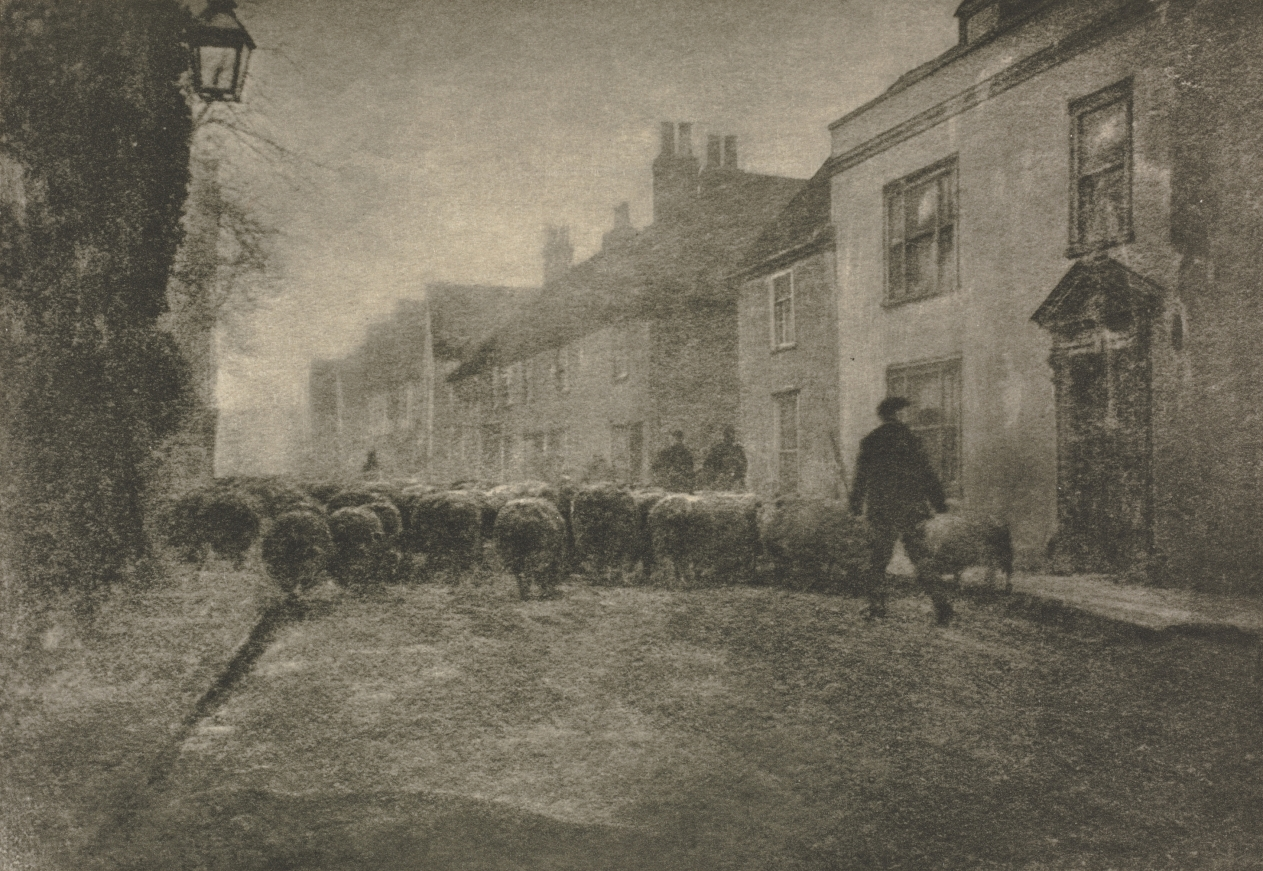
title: Camera Work: In a Village under the South Downs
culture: England, 20th century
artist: George Davison (British, 1856–1930)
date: 1907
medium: photogravure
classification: Bound Volume